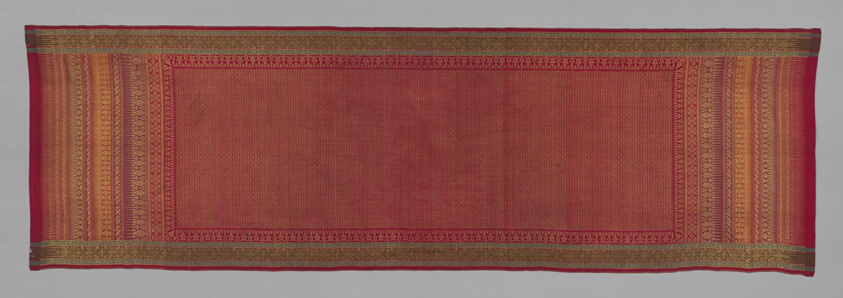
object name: Costume and Accessories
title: Woman's Sari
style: 19th century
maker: India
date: Late 19th century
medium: Silk and gilt-metal-wrapped thread, plain weave with supplementary pattern wefts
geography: India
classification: sari (garment); weaving; costume; dress (garment); clothing; textile; garment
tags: floral, botanical, diamond shapes, grids, stripes